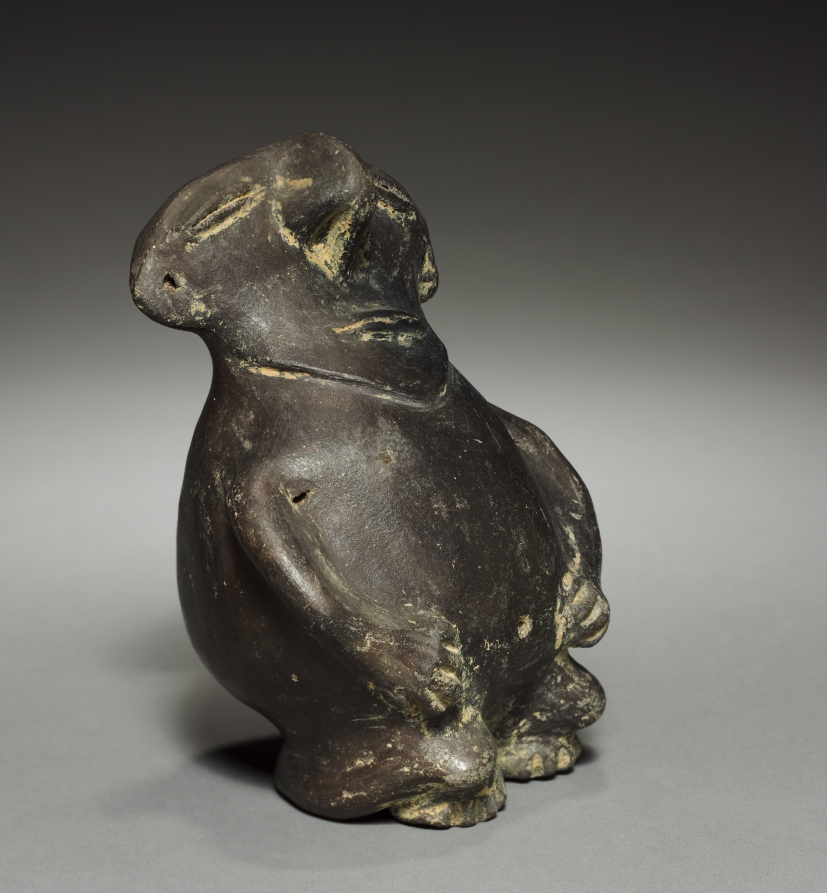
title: Figurine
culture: Colombia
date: before 1921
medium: pottery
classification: Ceramic